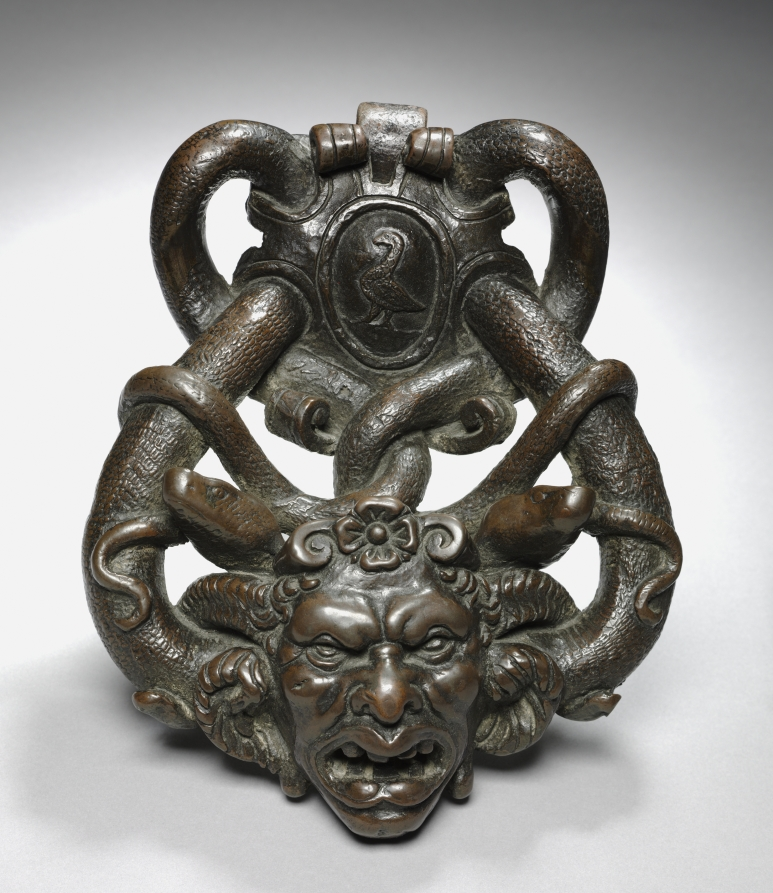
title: Doorknocker with Gorgon Head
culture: Italy, Venice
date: mid-1500s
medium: bronze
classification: Sculpture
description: Venice was a center for numerous bronze founders who made elaborate doorknockers for palace doors throughout the city. Although utilitarian, these objects were meant to impress as works of art in their own right. The presence of snakes that coil from this fearsome head suggest that this is Medusa, one of the three demon sisters in Greek mythology known as the Gorgons. According to some legends, Medusa was an attractive woman who, after having an affair with the god Poseidon in Athena's temple, was transformed by the goddess into a serpent-haired beast. Her visage was so terrifying that anyone who looked at it was turned to stone. The hero Perseus was ordered to decapitate Medusa, and Athena subsequently placed the monstrous head in the center of her shield. The use of the Gorgon's head as an ancient motif and protective symbol to avert evil developed from this fabled act. Such literary and iconographic traditions were known to Renaissance artists, and the presence of a Gorgon head on a doorknocker almost certainly evokes its guarding function for a Venetian home.